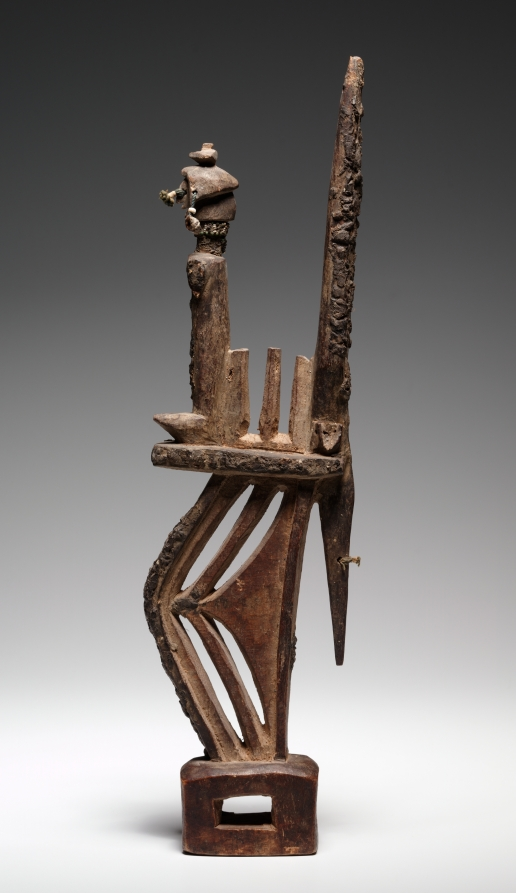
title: Headdress (chi wara)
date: early 1900s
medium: Wood, metal, glass beads, seashells, string, and probably tar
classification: Mask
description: Chi wara—a mythical “farming beast”—was said to teach farming to the Bamana people. Carved patterns cover this female chi wara’s body, highlighting its muscles and emphasizing that it is no earthly animal, but rather an agricultural spirit that combines human, antelope, and anteater elements. This example emphasizes vertical space, with a kneeling human figure on the back. The figure is adorned with imported beads as well as small shells. Accompanied by women’s songs, male performers danced paired male-and-female chi wara headdresses affixed to basketry caps at agricultural competitions and weddings.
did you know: Chi wara headdresses look different depending on the region in which they were made.